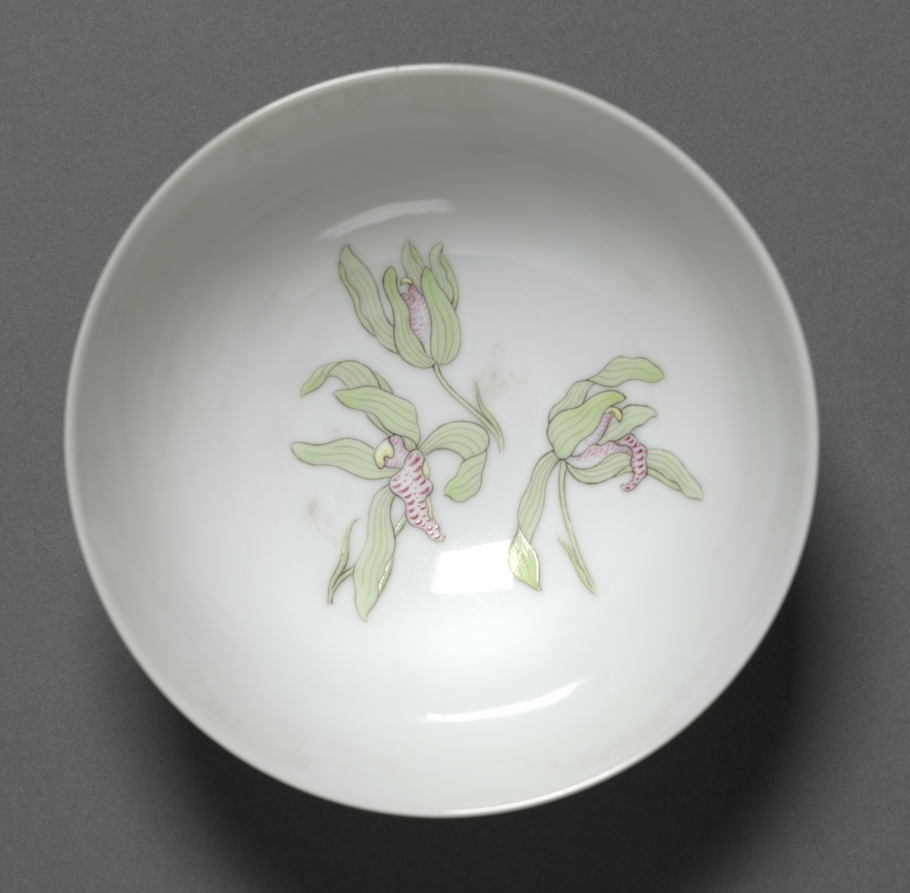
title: Bowl with Orchids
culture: China, Jiangxi province, Jingdezhen kilns, Qing dynasty (1644-1911), Qianlong mark and reign (1736-95)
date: 1736–1795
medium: porcelain with famille rose overglaze enamel decoration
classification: Ceramic